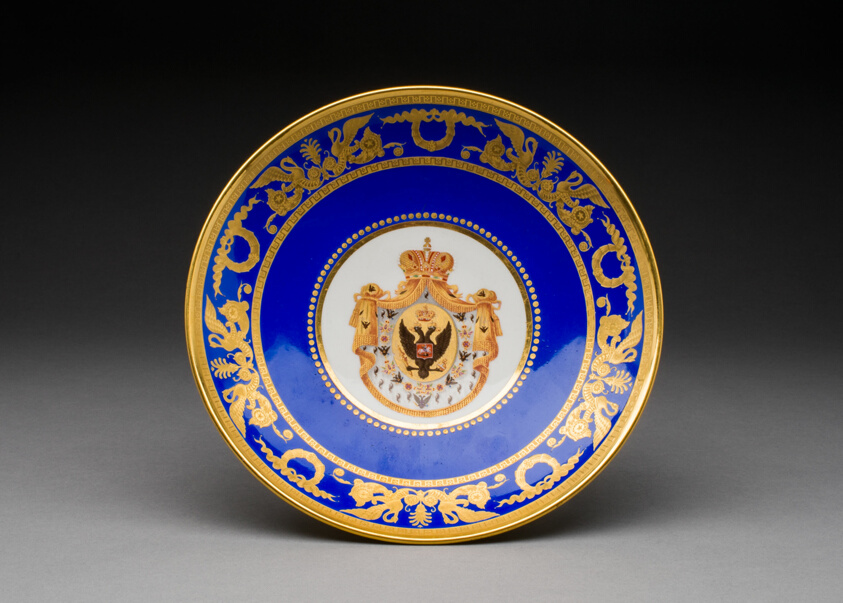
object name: Ceramics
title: Plate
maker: Russian Imperial Porcelain Factory (Russian, founded 1744)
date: 1855/81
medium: Porcelain, polychrome enamels, and gilding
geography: Saint Petersburg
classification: plate (general, dish); tableware; dish (vessel); porcelain; european decorative arts; ceramics